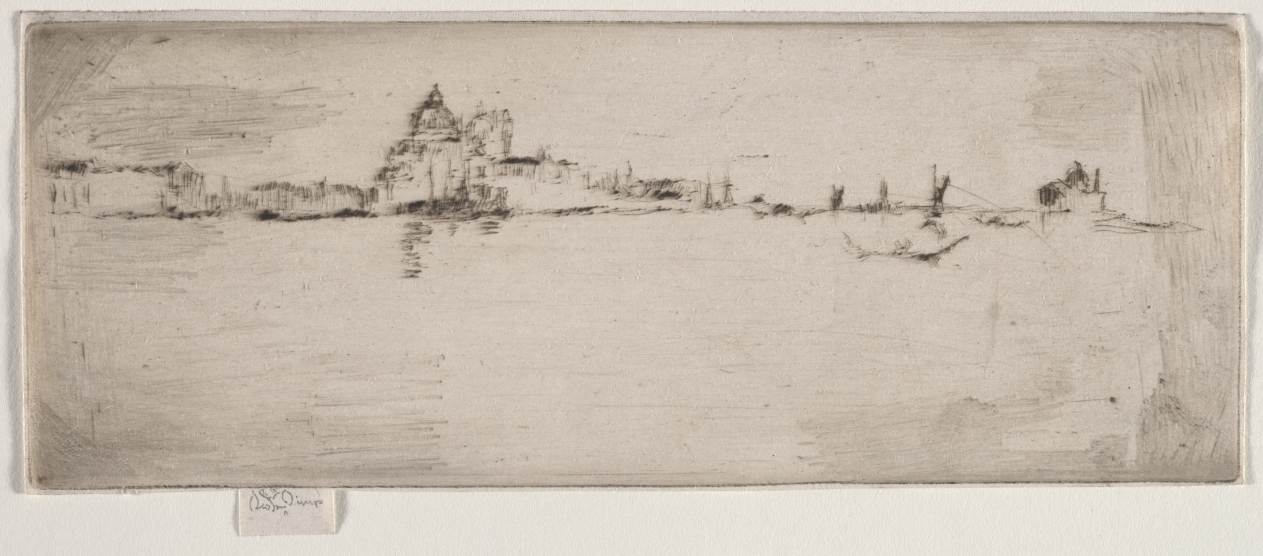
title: Little Salute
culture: America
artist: James McNeill Whistler (American, 1834–1903)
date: 1879–80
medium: drypoint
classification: Print